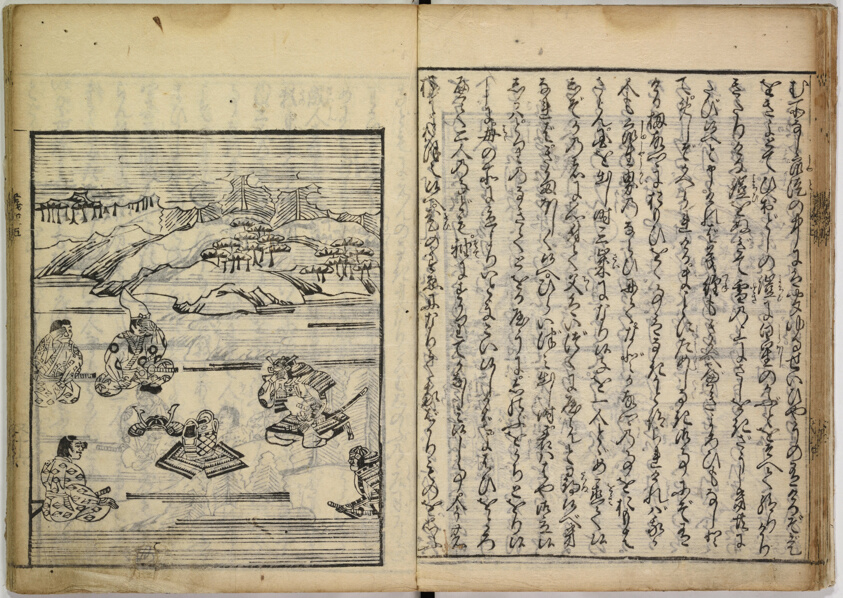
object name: Book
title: Record of Yoshitsune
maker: Artist unknown, Japanese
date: 1659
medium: Woodblock-printed book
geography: Japan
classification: book